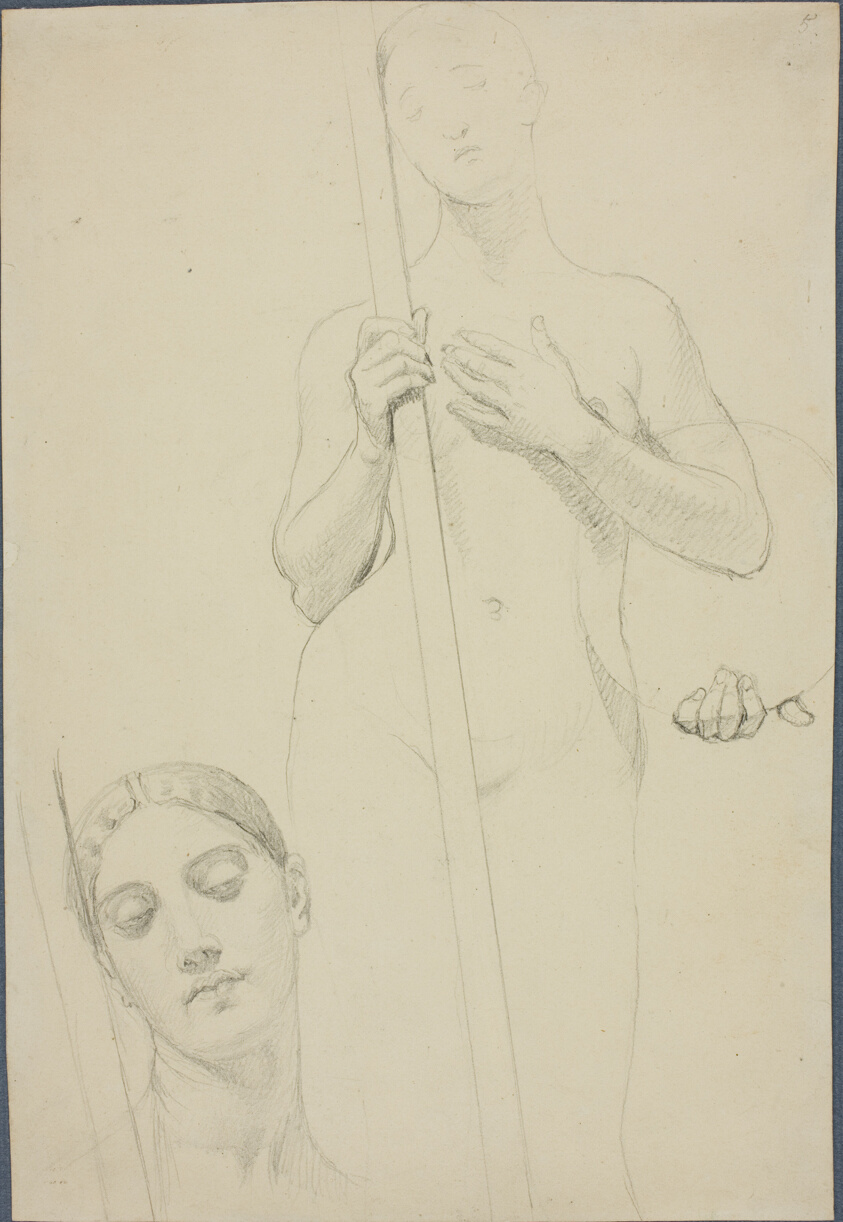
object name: Drawing and Watercolor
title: Study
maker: Jean–Auguste–Dominique Ingres; French, 1780–1867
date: c. 1842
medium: Graphite on cream wove paper, laid down on white wove paper, hinged on gray laid paper with blue fibers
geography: France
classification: graphite; drawings (visual works); prints and drawing